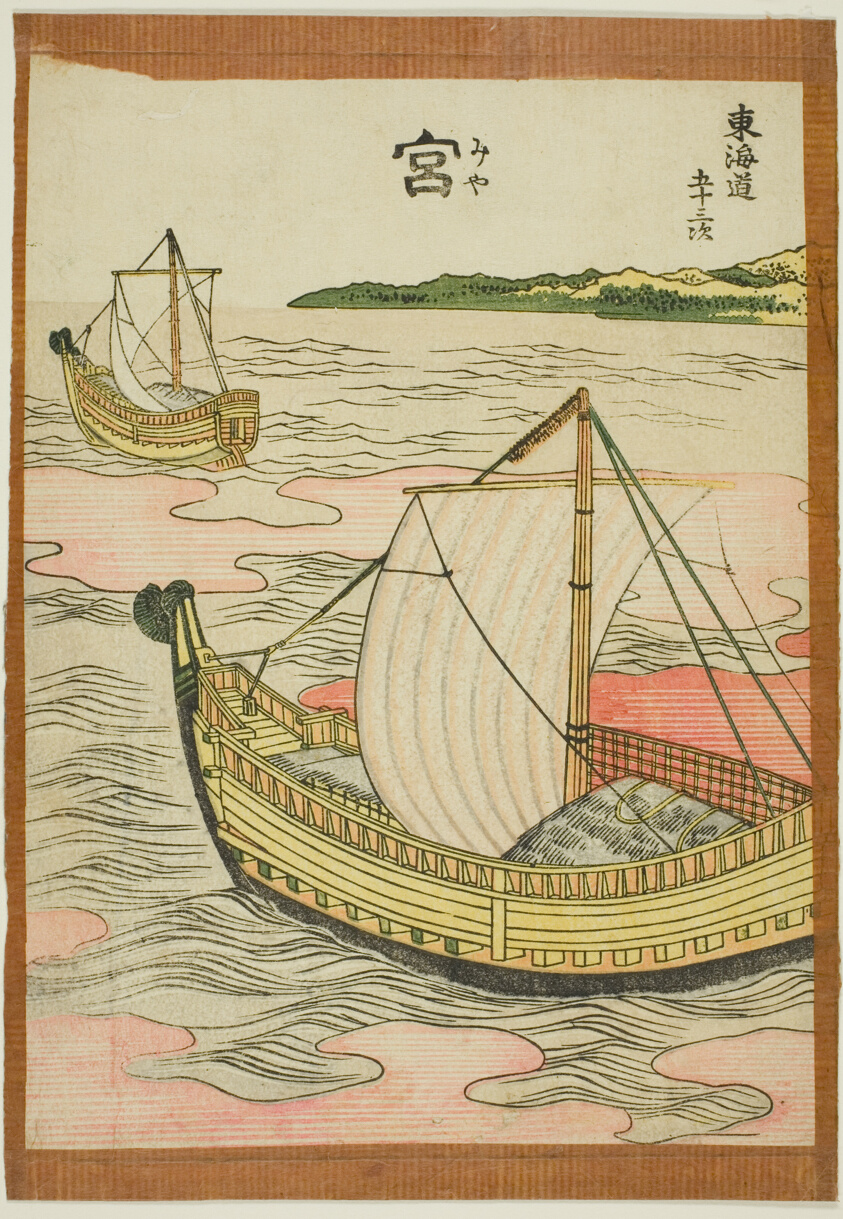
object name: Print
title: Miya (Mia), from the series "Fifty-three Stations of the Tokaido (Tokaido gojusan tsugi)"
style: Japanese (culture or style)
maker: Katsushika Hokusai 葛飾 北斎; Japanese, 1760-1849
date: c. 1806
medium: Color woodblock print; chuban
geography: Japan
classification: woodblock print; print; asian art